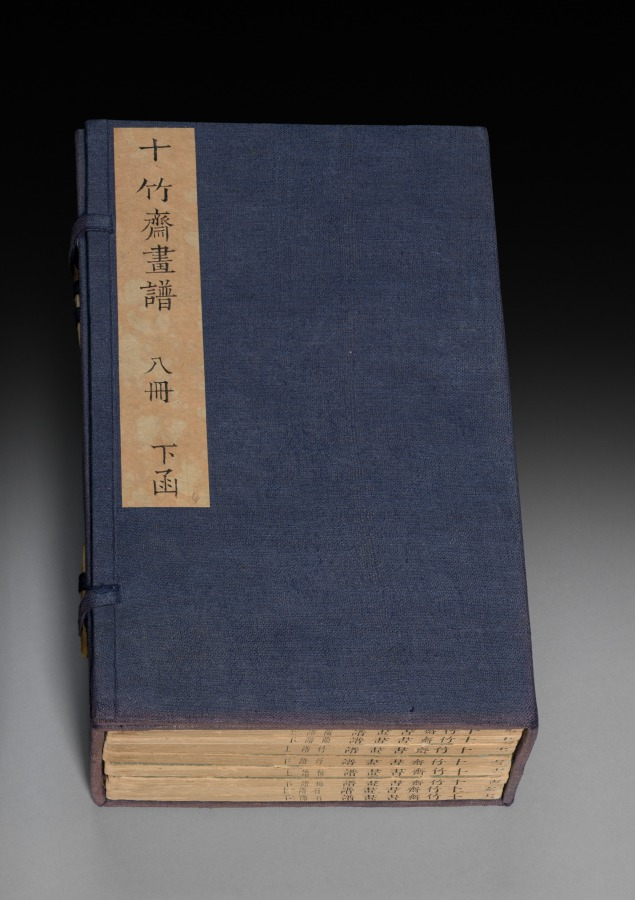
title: Ten Bamboo Studio Painting and Calligraphy Handbook (Shizhuzhai shuhua pu): Volume Two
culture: China, Jiangsu province, Nanjing, Qing dynasty (1644–1911)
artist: Hu Zhengyan (Chinese, c. 1584–1674)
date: 1633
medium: Woodblock-printed book; ink and colors on paper; first edition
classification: Print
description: Color printing reached a level of perfection in the early 1600s, as seen in this Ten Bamboo Studio Collection of Calligraphy and Painting and the Mustard Seed Garden Manual of Painting (printed 1679 and 1701). The painterly quality, precision in registering (aligning) the woodblocks, and harmonious colors made them the most successful color print editions in Chinese history. Both editions were printed and compiled in Nanjing, spread nationwide, and had a great impact on the arts in Japan and Korea.